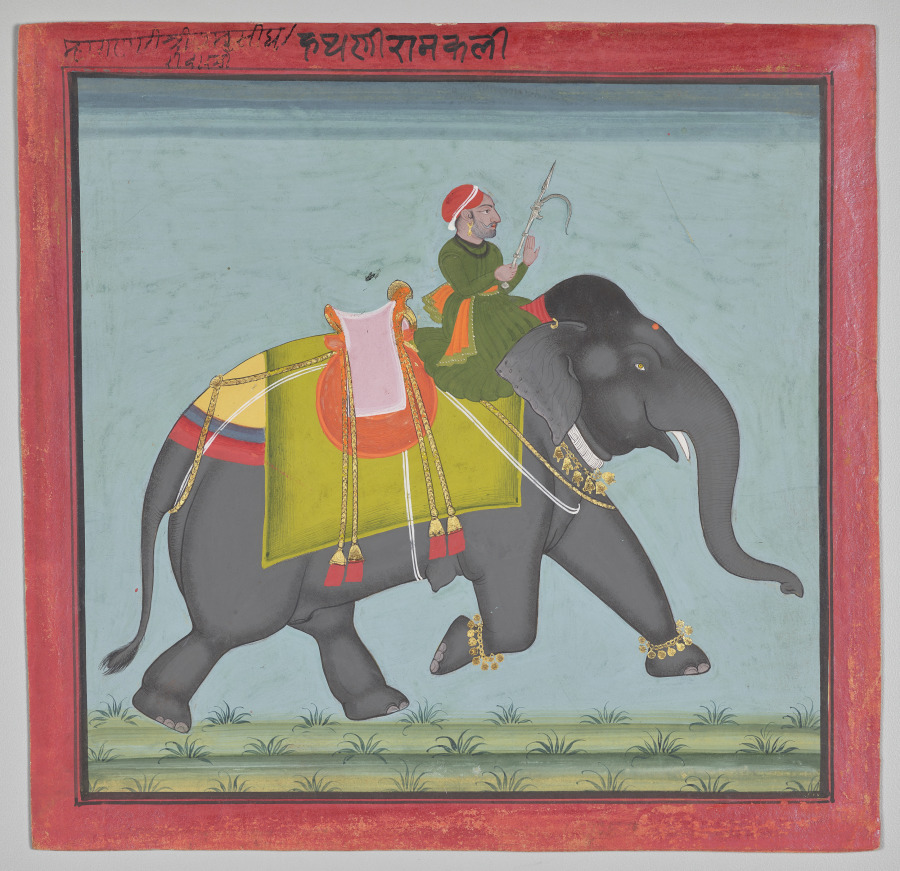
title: Royal Elephant Ramkali with a Mahout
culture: Northwestern India, Rajasthan, Rajput kingdom of Mewar, Udaipur, Court of Ari Singh (reigned 1761-73)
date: c. 1761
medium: gum tempera, ink, and gold on paper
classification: Painting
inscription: hathaṇī rāmkalī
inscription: mahārāṇaji śrī rāj (?) singh ri biraṇi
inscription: 13/44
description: The mahout (elephant driver), directs the confident female elephant at a brisk trot, with bells swinging in response to her movements. This painting belongs to a series depicting the elephants in the royal stables at Udaipur, each one named in the upper margin. Elephants have been a potent emblem for royalty in India for more than three thousand years.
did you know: The name Ramkali is a popular nickname for young girls in some parts of northern India.